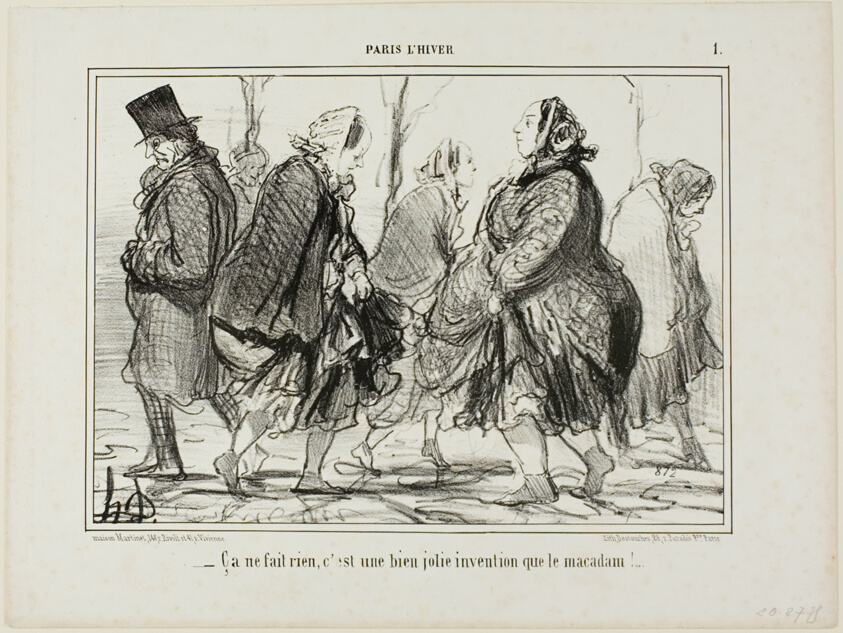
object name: Print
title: “- That's quite alright... isn't asphalt a marvellous invention?,” plate 1 from Paris L'hiver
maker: Honoré Victorin Daumier; French, 1808-1879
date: 1856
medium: Lithograph in black on white wove paper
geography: France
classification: lithograph; print; prints and drawing